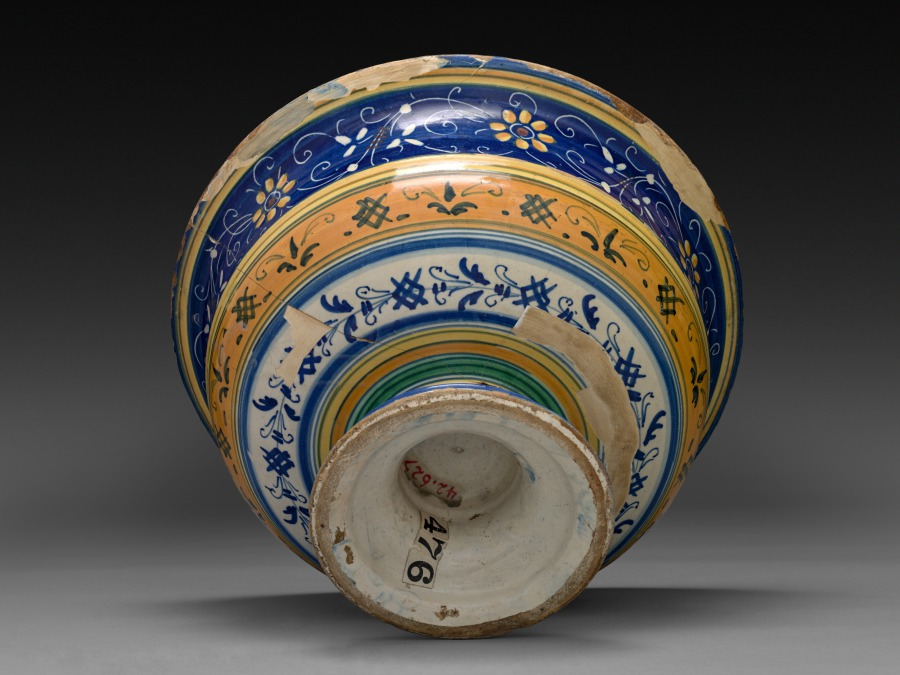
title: Bowl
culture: Italy, 16th century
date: c. 1520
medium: tin-glazed earthenware (maiolica)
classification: Ceramic